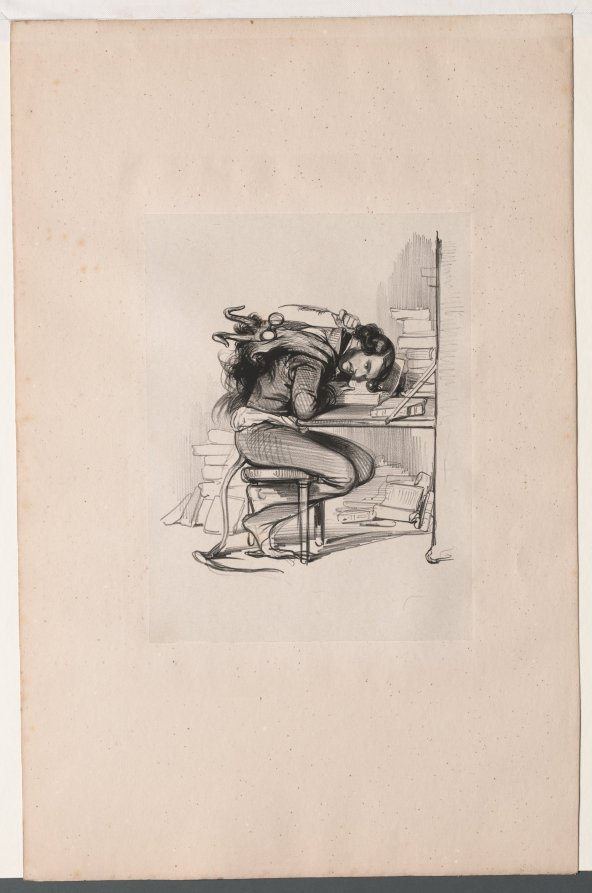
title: Émile Forgues (Old Nick)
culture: France, 19th century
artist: Paul Gavarni (French, 1804–1866)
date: c. 1835–1840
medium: lithograph on chine collé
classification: Print